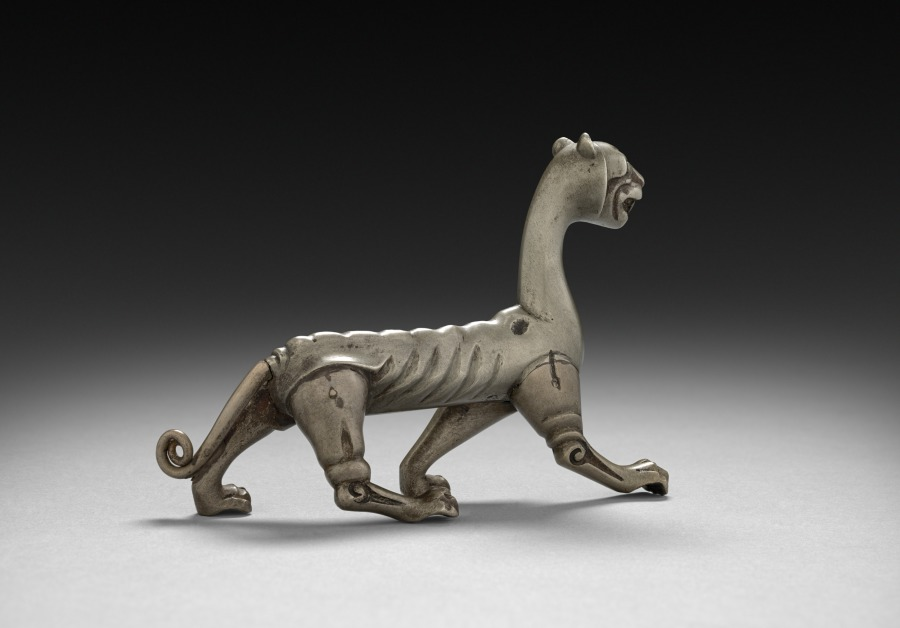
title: Walking Tiger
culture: China, Han dynasty (202 BCE–220 CE) to Six Dynasties (265–587 CE)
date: 206 BCE–220 CE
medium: silver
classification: Sculpture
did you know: The walking tiger was cast in six sections—the head and torso, the four legs, and the tail—and then were soldered together.